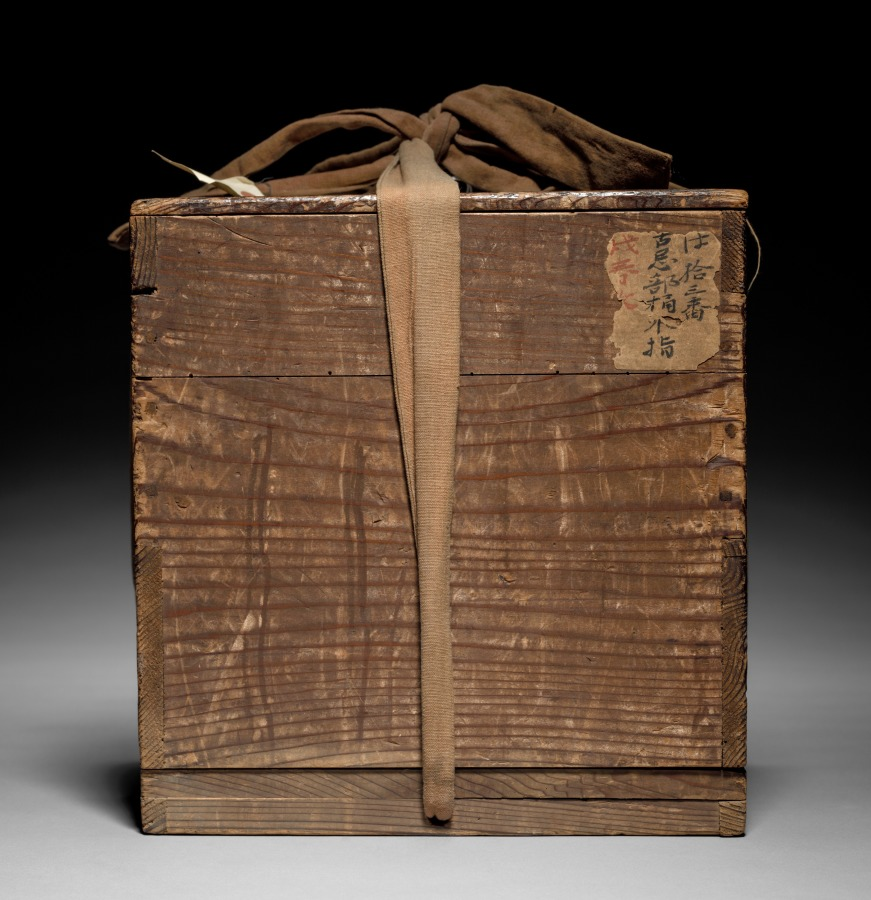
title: Water Container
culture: Japan, Momoyama period (1573–1615)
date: early 1600s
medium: glazed stoneware (Bizen ware, Imbe type)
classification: Ceramic